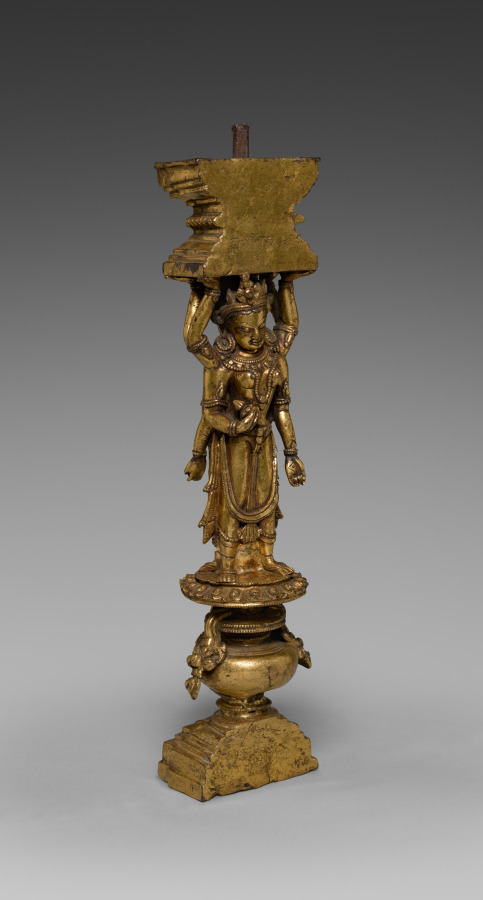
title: Support with Addorsed Figures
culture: Tibet, Densatil Monastery, 15th century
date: 1400s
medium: gilt bronze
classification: Sculpture